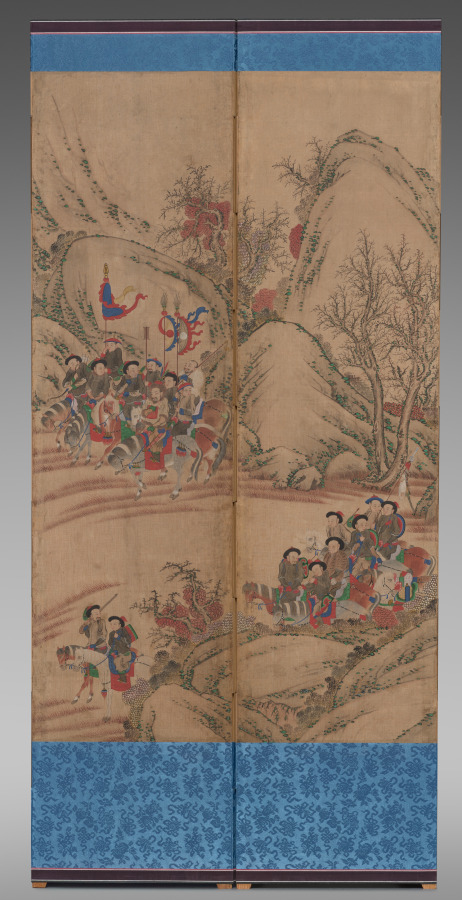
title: Hunting Scene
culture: Korea, Joseon dynasty (1392–1910)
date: 1800s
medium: eight-panel folding screen; ink and color on silk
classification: Painting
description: The theme of nomad warriors riding horses and hunting wild animals was first painted in the Qing imperial court in China in late 1600s. But it became favored by the Korean royal court and painted by the royal court painter in the late 1700s. The Joseon Korean ruling class members considered Qing nomad warriors to be "barbaric," yet highly admired their hunting and military skills. By the late 1800s, folding screens with the hunting scene were used largely for this dynamic and exotic feature.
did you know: The theme of nomad warriors hunting became highly appreciated in the Korean royal court of the 1700s for the king's particular interests in strengthening the royal army's military prowess.